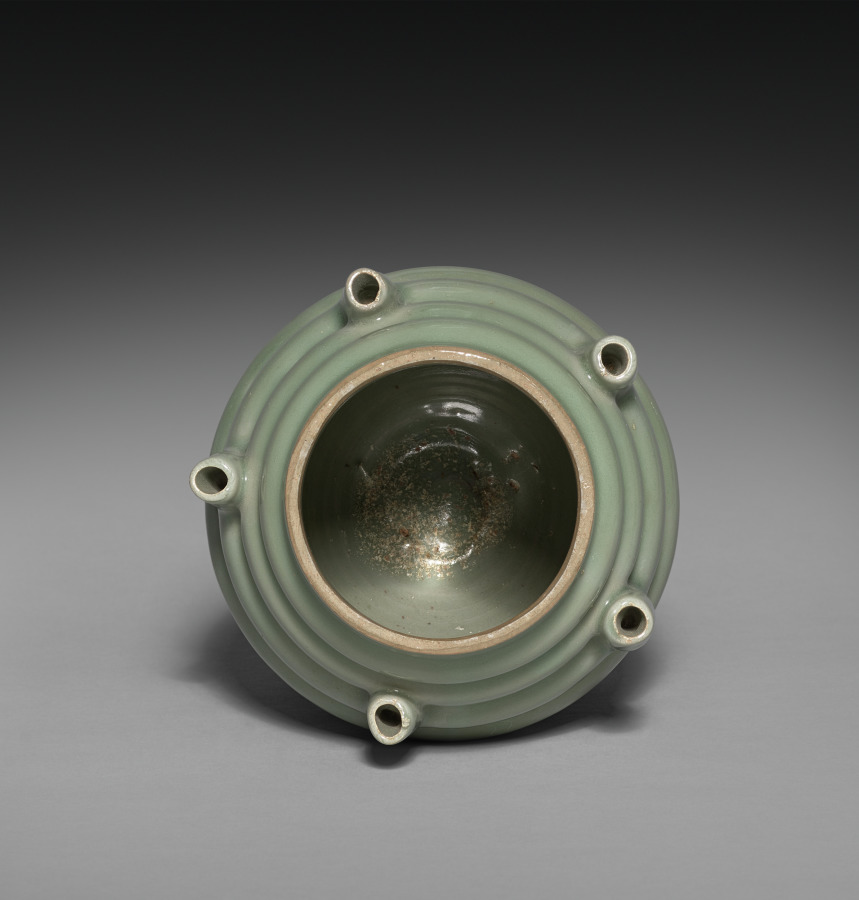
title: Five-Spouted Vase with Cover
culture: China, Zhejiang province, Longquan region, Northern Song dynasty (960-1127)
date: 1000s-1100s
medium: green-glazed porcelaneous stoneware, Longquan ware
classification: Ceramic